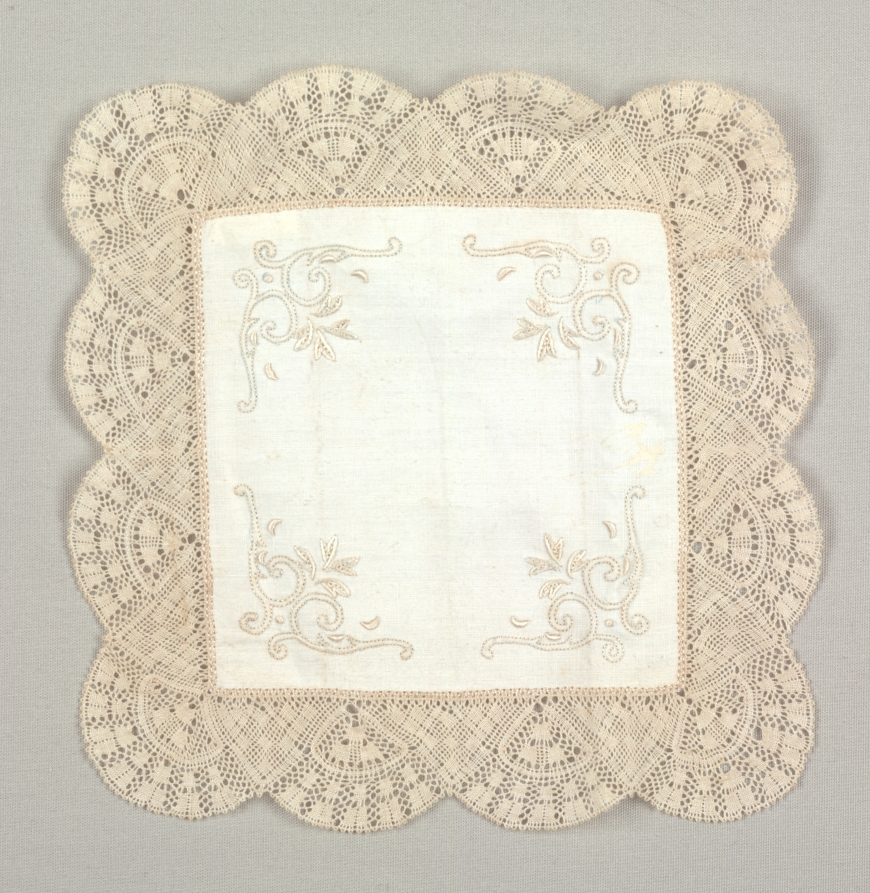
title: Lace Square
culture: Italy, Abruzzi, Pescocostanzo, l'Aquila, 19th century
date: 19th century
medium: bobbin lace with embroidery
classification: Lace